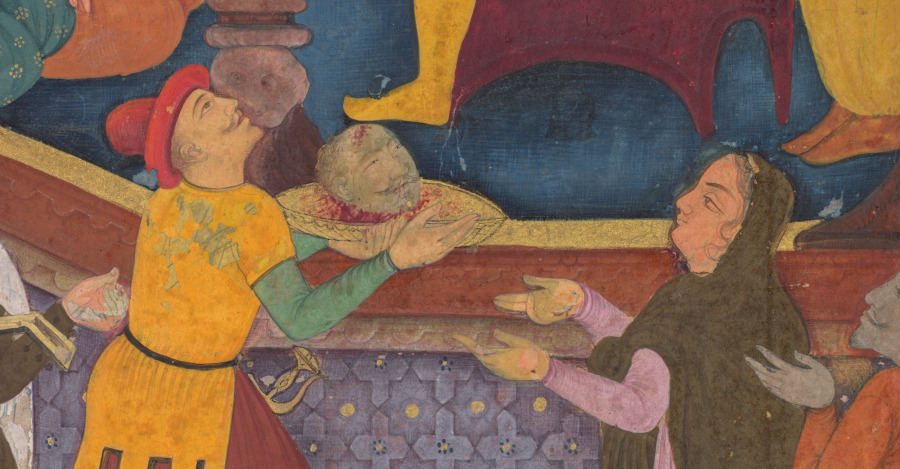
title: Salome Receiving John the Baptist’s Head on a Platter (folio 112 verso), from a Mirror of Holiness (Mir’at al-quds) of Father Jerome Xavier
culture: Mughal India, Allahabad, made for Prince Salim (1569–1627)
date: 1602–4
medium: Gum tempera, ink, color, and gold on paper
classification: Manuscript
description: Herod, King of Judea, sits on a Mughal-style throne as his wife’s daughter Salome reaches for the freshly severed head of John the Baptist. John had offended Herod’s wife, so she took revenge by having her daughter seduce Herod into granting her this wish. Salome is depicted modestly in this painting, and the court musician at the lower left looks on in disgust. The lion head capitals on the pillars above Herod are upside down, seemingly in disapproval of the debauched king.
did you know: Column capitals in Herod’s palace have angels seated on upside-down lion heads.